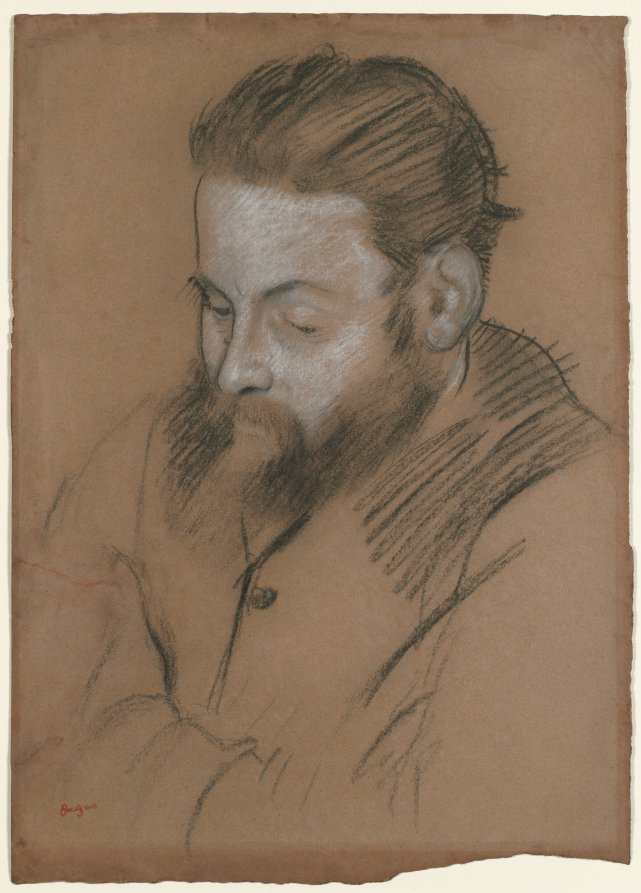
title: Diego Martelli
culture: France, 19th century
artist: Edgar Degas (French, 1834–1917)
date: 1879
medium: charcoal and white chalk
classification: Drawing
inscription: stamped in red, at lower left: Degas estate stamp (Lugt 658)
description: This sheet is one of many studies that Degas made in 1879 of his friend and supporter, the Italian art critic and patron Diego Martelli (1839-1896). Martelli was one of the most important champions of progressive modern art in Italy, and his writings on the 1879 Impressionist show became famous, playing a crucial role in publicizing the movement. This sheet relates to two painted portraits of the critic, one in the National Gallery of Scotland, Edinburgh, and the other in the National Museum of Fine Arts, Buenos Aires.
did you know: The ghostly white tone of Diego Martelli's face was likely pink or peach when Degas made the work, and has gradually faded over time.